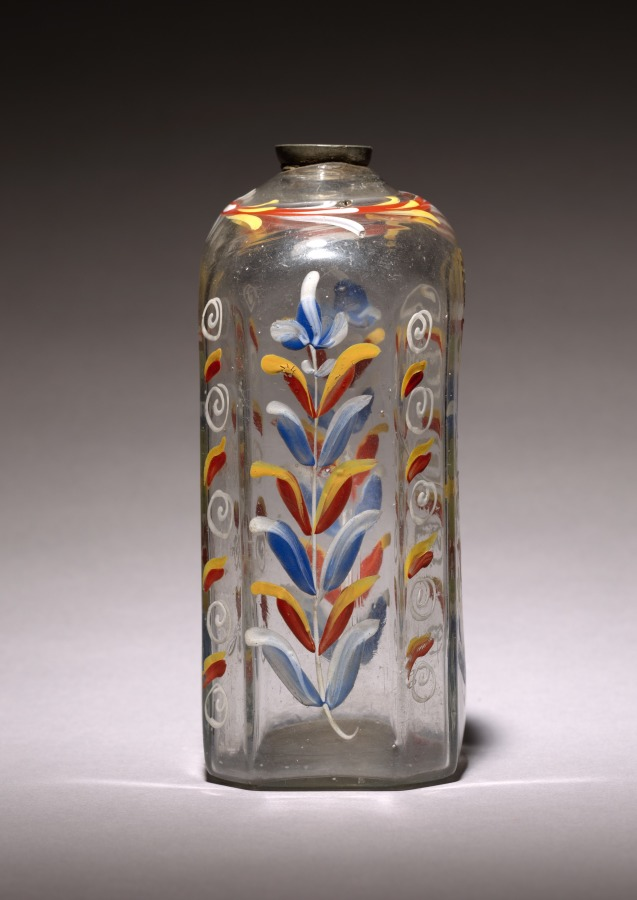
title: Enameled Bottle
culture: America, Stiegel Type, 18th century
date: 1700s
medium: glass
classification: Glass